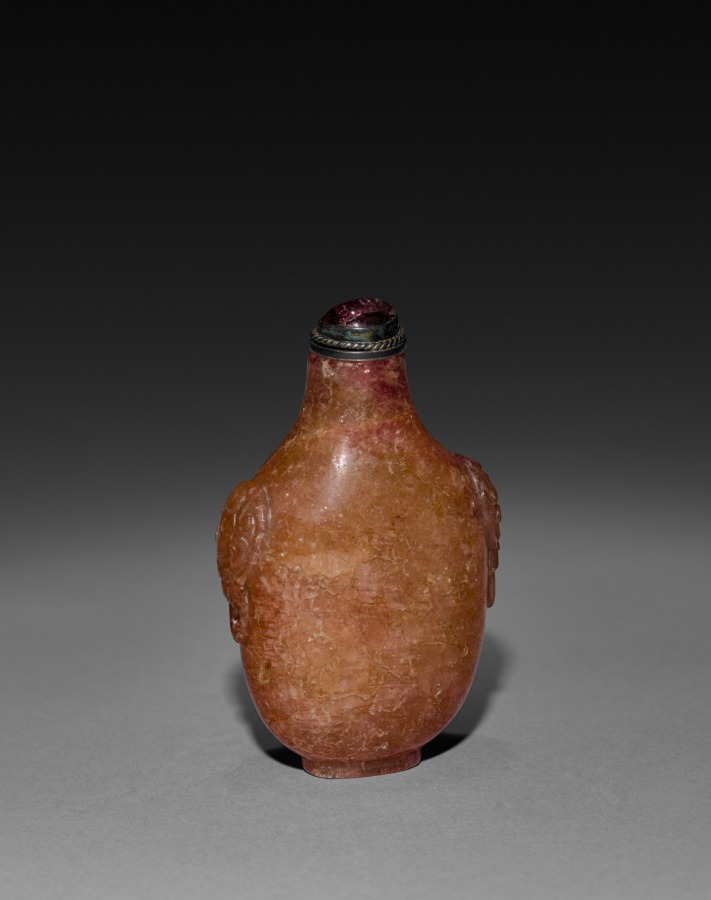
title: Snuff Bottle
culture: China, Qing dynasty (1644-1911)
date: 1644–1911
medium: glass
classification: Glass